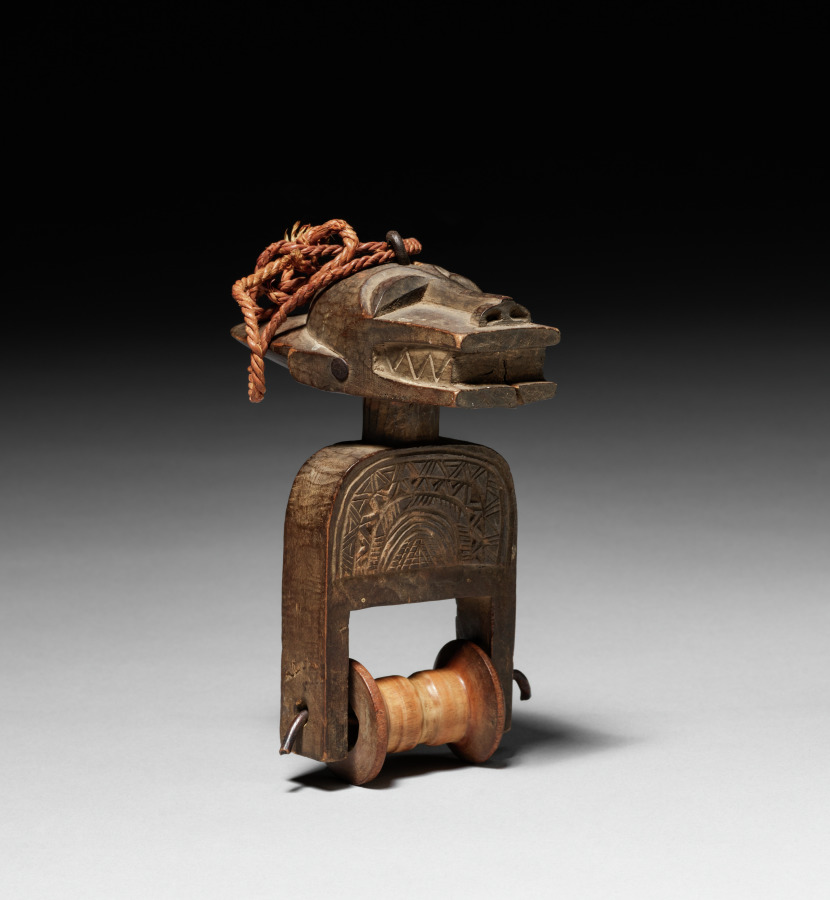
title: Heddle Pulley (Bo Nun Amuin mask)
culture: Africa, West Africa, Côte d’Ivoire, Baule-style carver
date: 1900s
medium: Wood, metal, and plant fiber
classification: Implements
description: The heddle pulley, a working element of a narrow-band loom, bears a miniature sculpture. Heddle pulleys support and separate threads during weaving. Mounted above the weaver, the pulleys allow him to glance up at an object of inspiring beauty, rather than pure functionality. This pulley depicts a face mask, a secular usage of a typically sacred mask type.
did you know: This heddle pulley depicts a fearsome Bo Nun Amuin mask that recalls nature spirits.